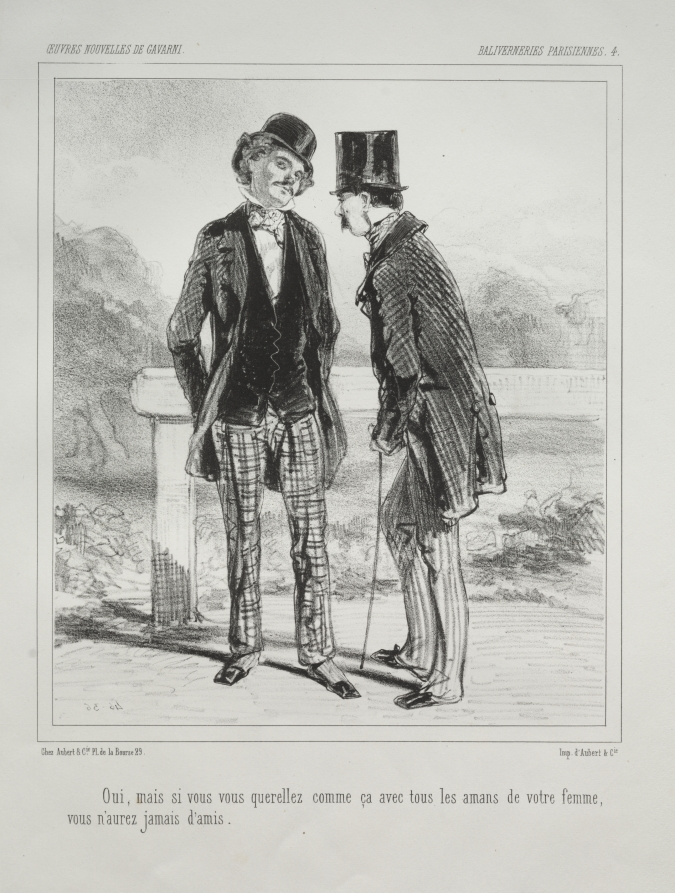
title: Baliverneries Parisiennes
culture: France, 19th century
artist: Paul Gavarni (French, 1804–1866)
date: c. 1847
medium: lithograph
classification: Print